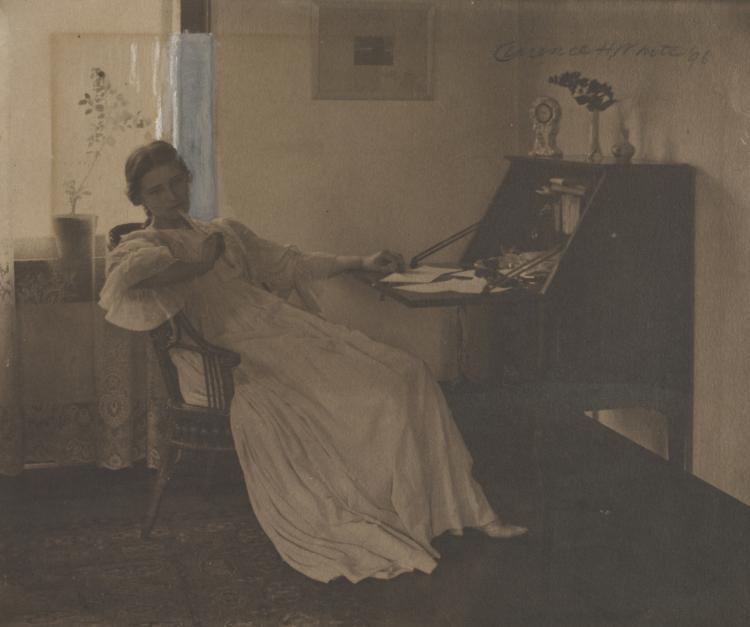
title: What Shall I Say?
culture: America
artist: Clarence H. White (American, 1871–1925)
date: 1896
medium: platinum print with gouache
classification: Photograph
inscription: Written in pencil on recto of photo: "Clarence H. White [signed] '96"